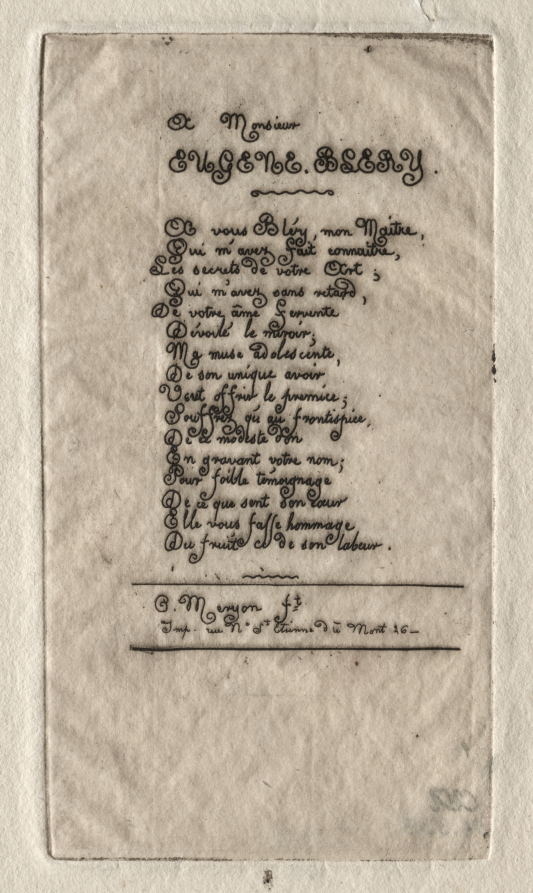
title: Verses to Eugène Bléry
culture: France, 19th century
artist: Charles Meryon (French, 1821–1868)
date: 1854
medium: etching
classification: Print